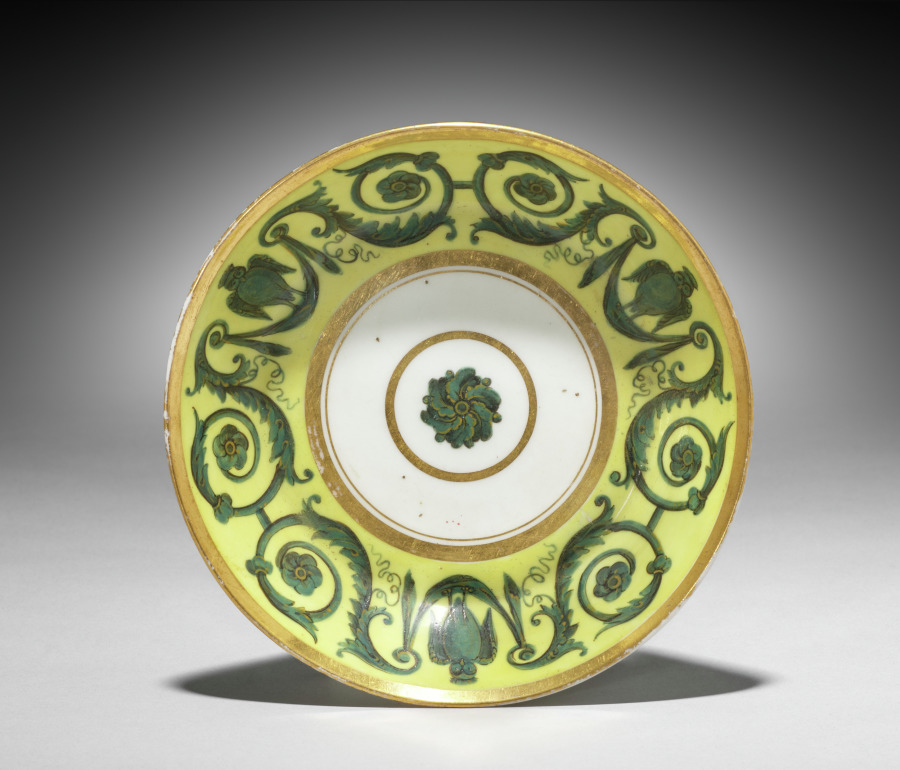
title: Saucer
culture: England, 19th century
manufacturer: Worcester Porcelain Factory (British, established 1751)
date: 1807–1813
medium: porcelain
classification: Ceramic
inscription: in overglaze red: "Barr, Flight and Barr/ Royal Porcelain Works/ Worcester/ London -- House/ Flight & Barr/ Coventry Street," surrounded by: "Manufacturers to their Majesties Prince of Wales and Royal Family. Established 1751."